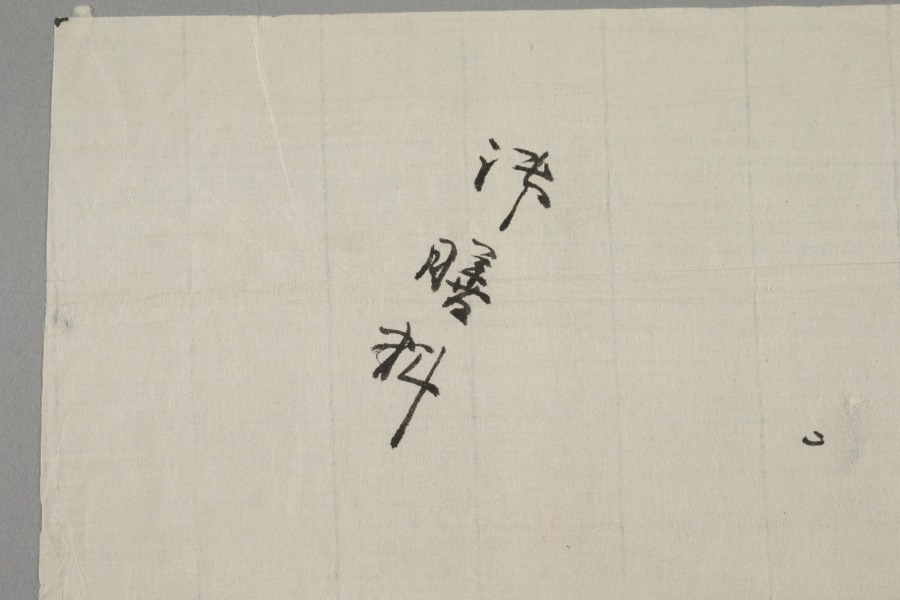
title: Tiger in Wind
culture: Japan, Edo period (1615–1868) to Meiji period (1868–1912)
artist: after Maruyama Ōkyo (Japanese, 1733–1795)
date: 1800s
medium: hanging scroll; ink on paper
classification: Painting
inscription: 「秋空一鶴」賛 長嘯一聲風括地「月渚」朱文方印「祐常之章」白文方印 壬辰初冬寫応挙 「應舉之印」白文方印・「仲選」白文方印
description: The seals appended to the inscription on this painting suggest that the text was brushed by Yūjō (1723–1773), an imperial prince who became a Buddhist monk and was abbot of Enman'in at Miidera. The line is from a poem attributed to a Yuan dynasty poet, Yu Ruyu (dates unknown), and describes the sound of a fierce wind lashing the ground. Wind is associated with the roar of the tiger. Yūjō was Maruyama Ōkyo's most important patron as a young artist, and this painting has a signature asserting that Ōkyo created it in 1772, the year before Yūjō's death. While Yūjō produced a preface for a now famous set of handscrolls he commissioned Ōkyo to paint, and a number of Ōkyo's compositions for Enman'in survive, this work would appear to be one imagining their relationship, as opposed to a genuine piece.